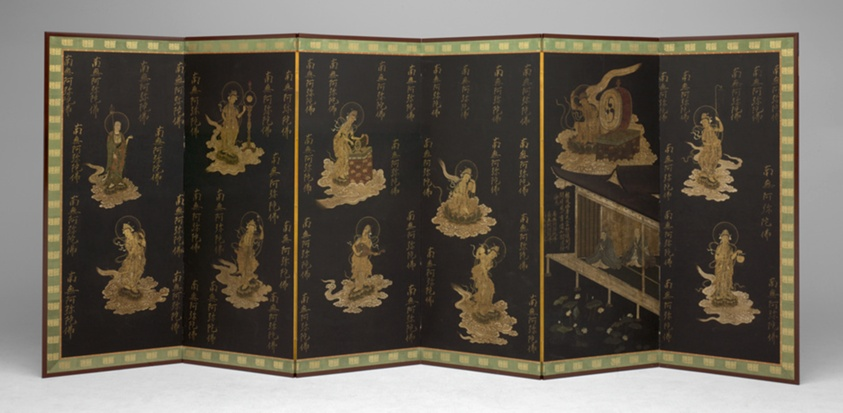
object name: Painting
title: Rebirth of the Nun Anyo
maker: Artist Unknown; Japanese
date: Early 18th century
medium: Six-panel screen (one of a pair); Ink, colors, and gold on paper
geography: Japan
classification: screen; painting; asian art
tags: Buddhism, religion